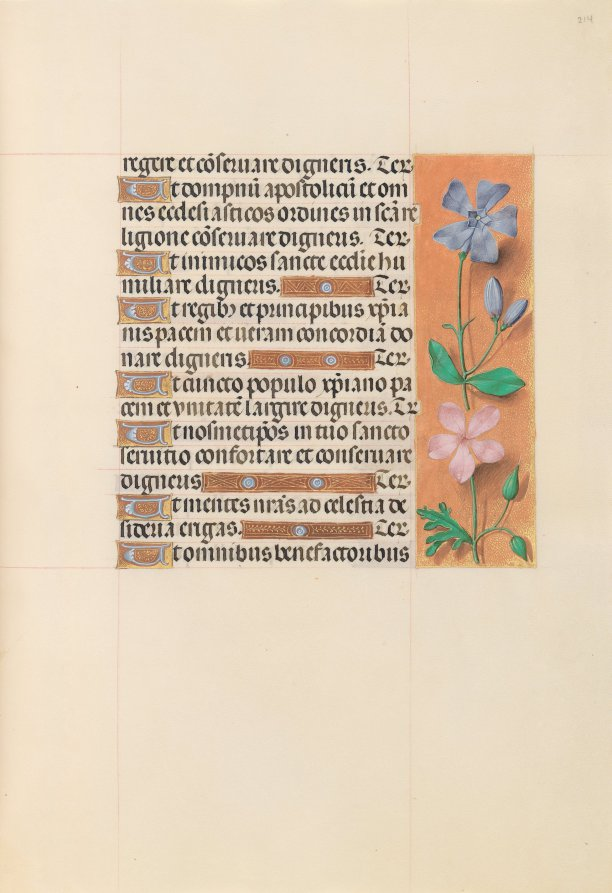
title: Hours of Queen Isabella the Catholic, Queen of Spain: Fol. 214r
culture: Flanders, Ghent and Bruges, late 15th century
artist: Master of the First Prayerbook of Maximillian (Flemish, c. 1444–1519)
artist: and Associates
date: c. 1500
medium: ink, tempera, and gold on vellum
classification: Bound Volume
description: This manuscript was illuminated by a circle of at least five highly organized manuscript painters active in the Flemish cities of Ghent and Bruges. The principal illuminator was Alexander Bening, who painted the majority of the book's miniatures. Manuscripts produced by this circle of artists are renowned for the decoration of their borders, which typically feature a rich variety of realistically-painted flowers, birds, and butterflies. This prayer book, called a book of hours, was intended not for a cleric, but for the private devotions of a lay person-in this case, Isabella the Catholic, Queen of Spain (1451-1504). Isabella's coat of arms embellishes the book's frontispiece. It is unlikely that the book was commissioned by the Queen herself; rather, she probably received it as a diplomatic gift from someone courting her patronage, perhaps Cardinal Francisco Jimenez de Cisneros. A Franciscan friar, Jimenez was dependent upon Isabella for his advancement, first to the post of Queen's confessor in 1492, and then to Archbishop of Toledo in 1495.